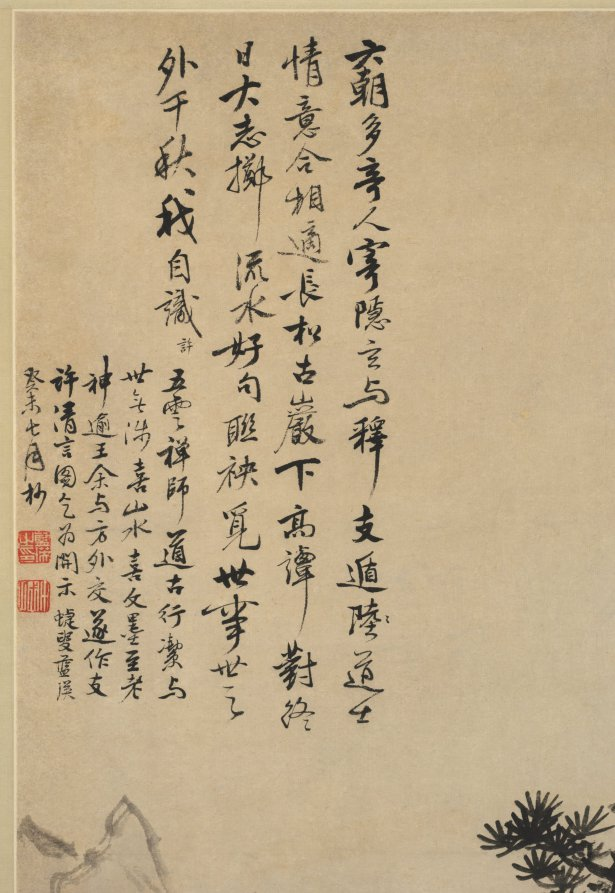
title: Zhi and Xu's Pure Conversation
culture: China, Ming dynasty (1368–1644)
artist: Lan Ying (Chinese, 1585–after 1664)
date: 1643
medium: Hanging scroll; ink on paper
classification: Painting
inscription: 六朝多奇人，寄隱玄與釋。/ 支遁許道士，情意合相適。/ 長松古巖下，高譚對終日。/ 大志擲流水，好句聯袂覓。/ 世事世之外，千秋我自識。 五雲禪師道古行潔，與世無涉。喜山水，喜文 墨。至老神逾王。余與方外交，遂作支許清言 圖，乞為開示。 蝶叟藍瑛癸未七月杪。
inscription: 2 additional seals of Cheng Qi 程琦 (1911–1988)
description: Lan Ying’s painting is a gift to his friend, the Chan monk Wuyun, in which he depicted two sages of the Six Dynasties period: the Buddhist monk Zhidun (314–366 CE), and the Daoist priest Xu Xun (265–420 CE). Meant to be understood as an analogy of the friendship between artist and monk, the painting also offered a retreat into the past, a year before the fall of the Ming dynasty. A professional painter born in Hangzhou, Lan Ying is traditionally considered a last representative of the Zhe school. Lan wrote poetic inscriptions and interacted with the literatus Chen Jiru (1558–1639).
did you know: This painting serves as an analogy of the friendship between artist and monk.